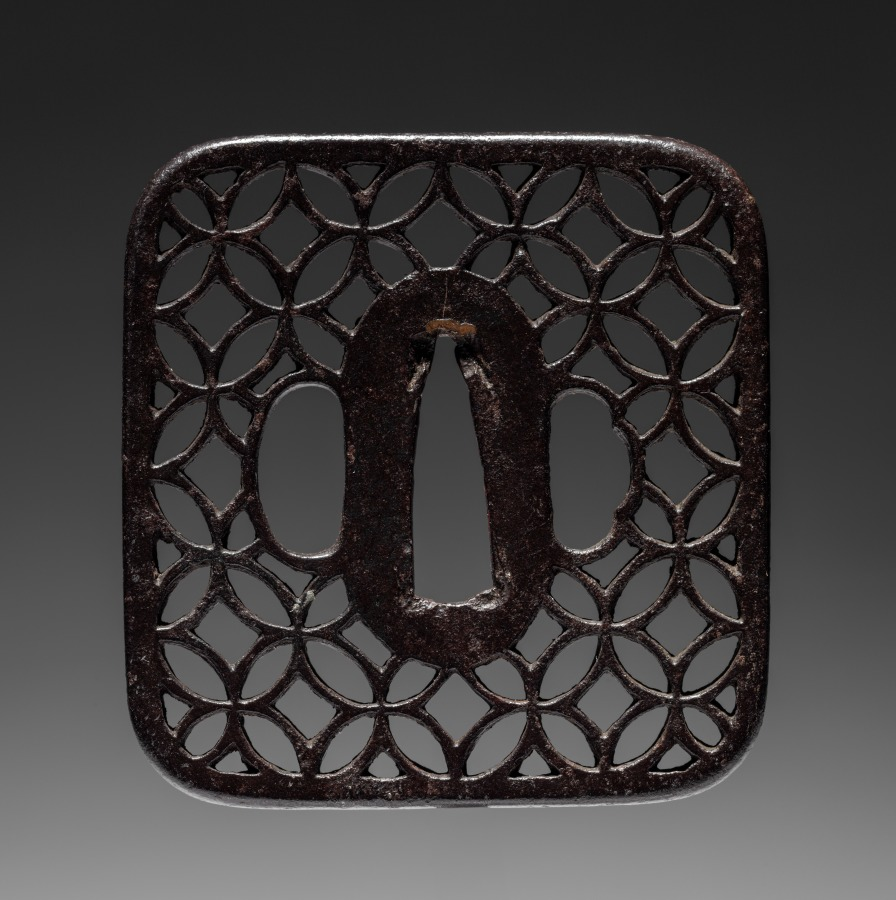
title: Sword Guard (Tsuba)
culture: Japan, possibly Edo period (1615-1868)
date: c. 1615–1868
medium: iron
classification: Arms and Armor